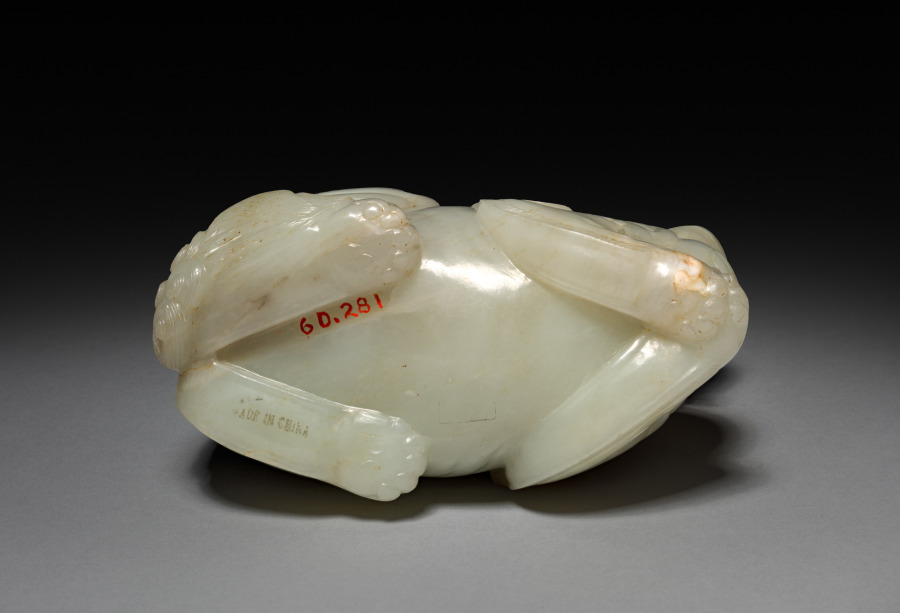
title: Fantastic Animal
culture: China, Qing dynasty (1644-1911)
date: 1700s–1800s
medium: jade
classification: Jade